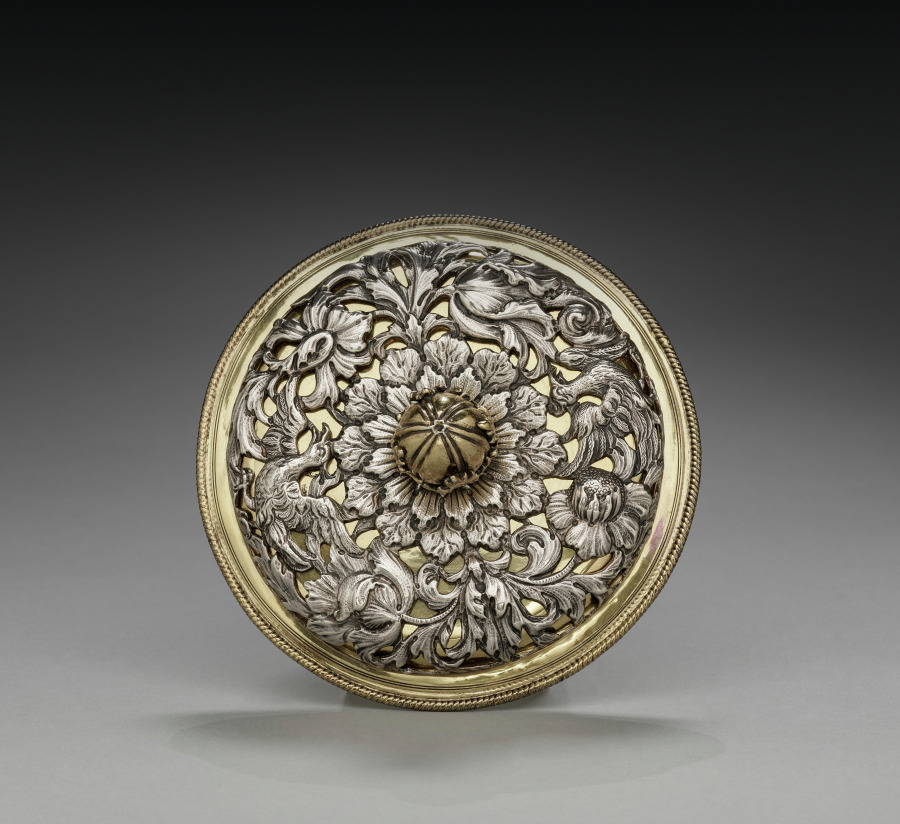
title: Cover for a Two-Handled Cup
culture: England, London, 17th century (Charles II)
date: 1677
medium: silver and silver gilt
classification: Silver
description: Due to its size and ornament, the vessel accompanying this lid may have functioned as a caudle cup, containing a mixture of ale or wine and bread, oatmeal, eggs, sugar, and spices that was given to women after childbirth to help them regain their strength. The scrolling foliage and exotic birds along the exterior of the cup were likely based on prints circulating in the 1600s. The reclining female figures capping the handles and the acanthus bud finial on the lid recall common architectural motifs.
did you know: This is a lid for a two-handled cup. See cover record.